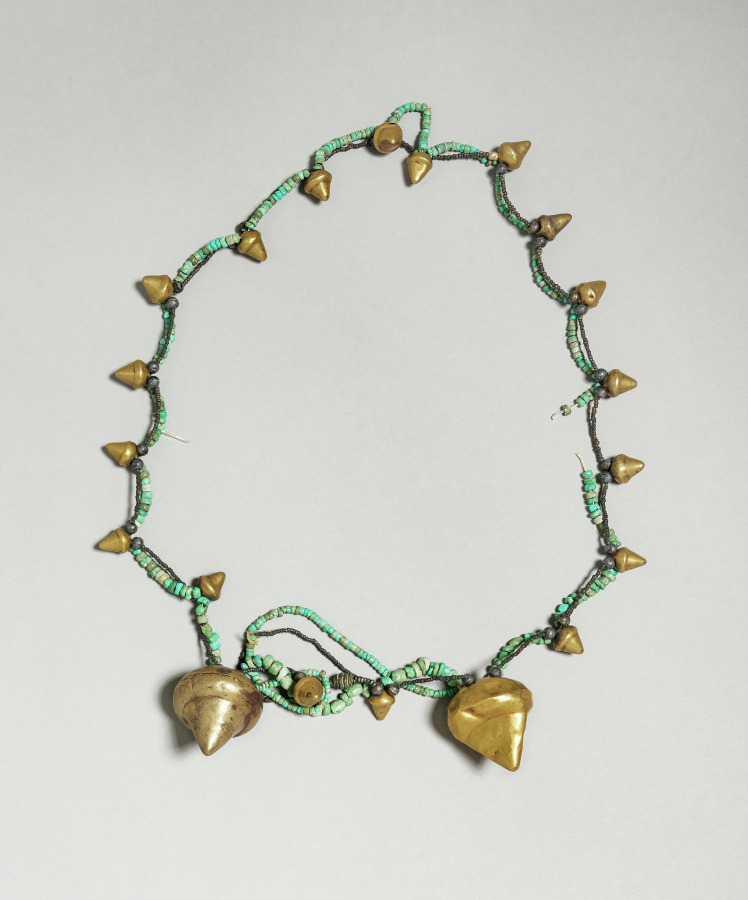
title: Necklace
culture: Peru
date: before 1532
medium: gold and turquoise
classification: Jewelry